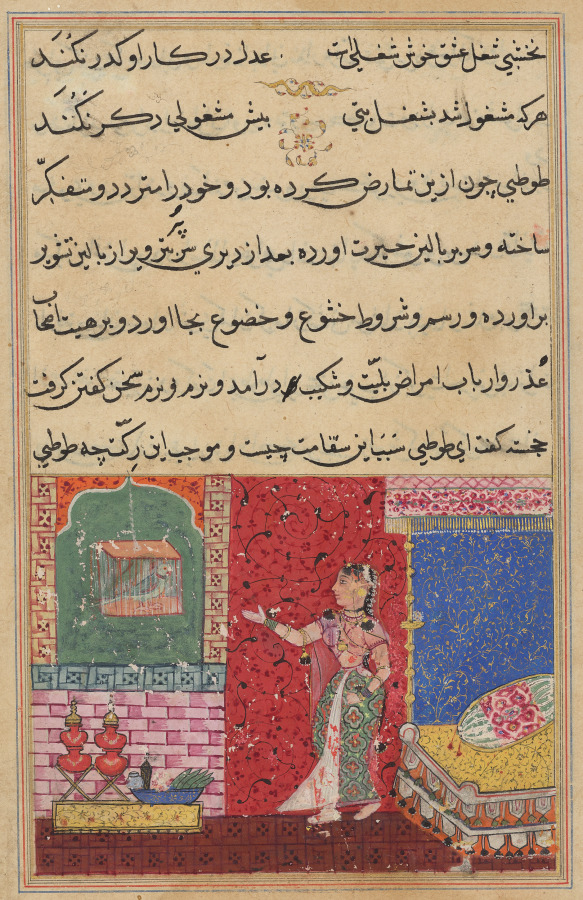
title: The Parrot Addresses Khujasta at the Beginning of the Fifteenth Night, from a Tuti-nama (Tales of a Parrot)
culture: India, Mughal court, 16th century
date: c. 1560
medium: gum tempera, ink, and gold on paper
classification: Painting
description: Panels of bold color are closely reminiscent of local Indian painting traditions, as seen in the page to the left. The artist here is experimenting with depicting three-dimensionality in the angled rendering of the bed, the placement of Khujasta’s feet on the plane of the floor, and the parrot who stands in the space of his cage. In comparison to the figures in The Sage Narada tells King Kamsa of Vishnu’s Impending Incarnation to the left, Khujasta’s gesture is less pertly angular, and her face has smaller features and gentler contours. Falsely encouraging her to go meet her lover, the parrot tells her that if she doesn’t go, and her husband returns, she would regret not having gone to see him just as the cat repented having killed the mice. She must then hear the story of why a cat would regret killing mice.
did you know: The stacked red jugs on the left are water pots.